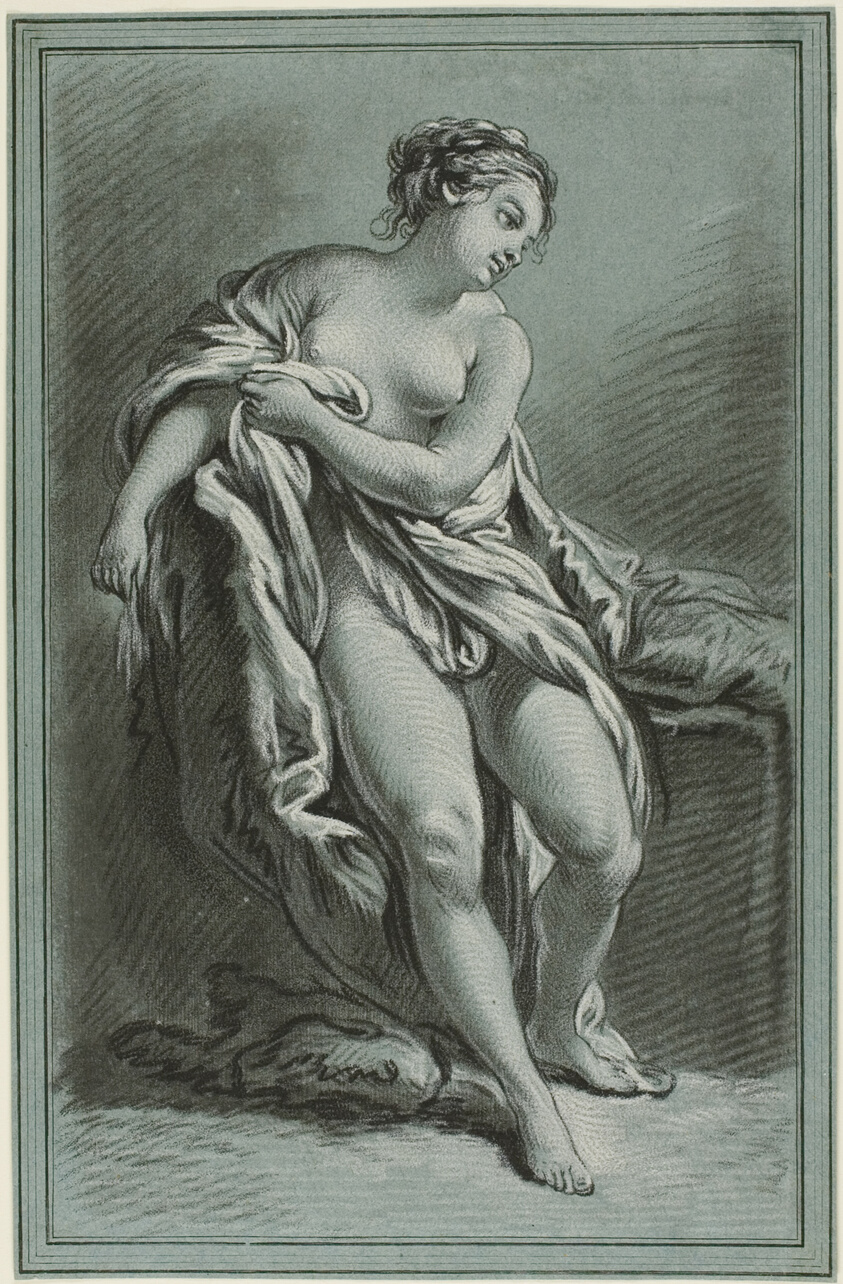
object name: Print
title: Bather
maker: Louis-Marin Bonnet (French, 1736-1793); after François Boucher (French, 1703-1770)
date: 1768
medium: Crayon-manner in black and white on blue laid paper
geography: France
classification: etching; print; prints and drawing